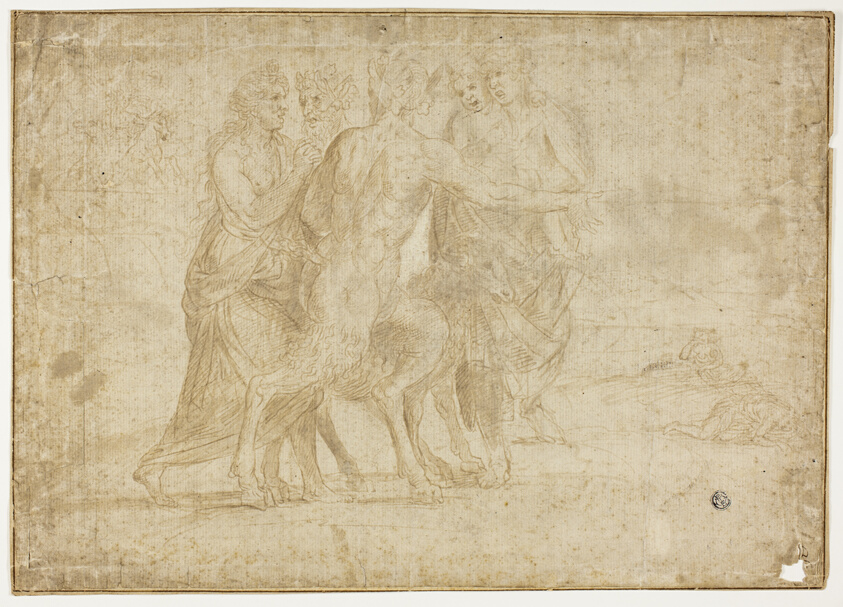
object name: Drawing and Watercolor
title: Faun and Nymphs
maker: possibly after Raymond de Lafage; French, 1656-1690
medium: Pen and brown ink, with brush and brown wash, on gray laid paper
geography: France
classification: pen and ink drawings; drawings (visual works); prints and drawing